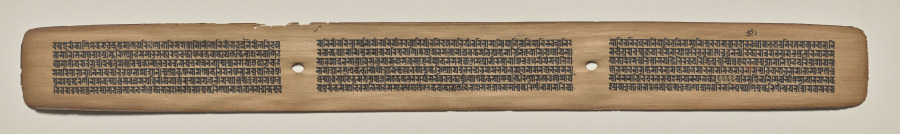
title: Text, folio 172 (recto), from a Manuscript of the Perfection of Wisdom in Eight Thousand Lines (Ashtasahasrika Prajnaparamita-sutra)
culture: Eastern India, Bihar, Vikramashila Monastery. Painting: Nepal, Kathmandu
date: Sunday, September 14, 1119 (year 239 of the Newar Samvat in the month of Ashvina)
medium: gum tempera and ink on palm leaves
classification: Painting